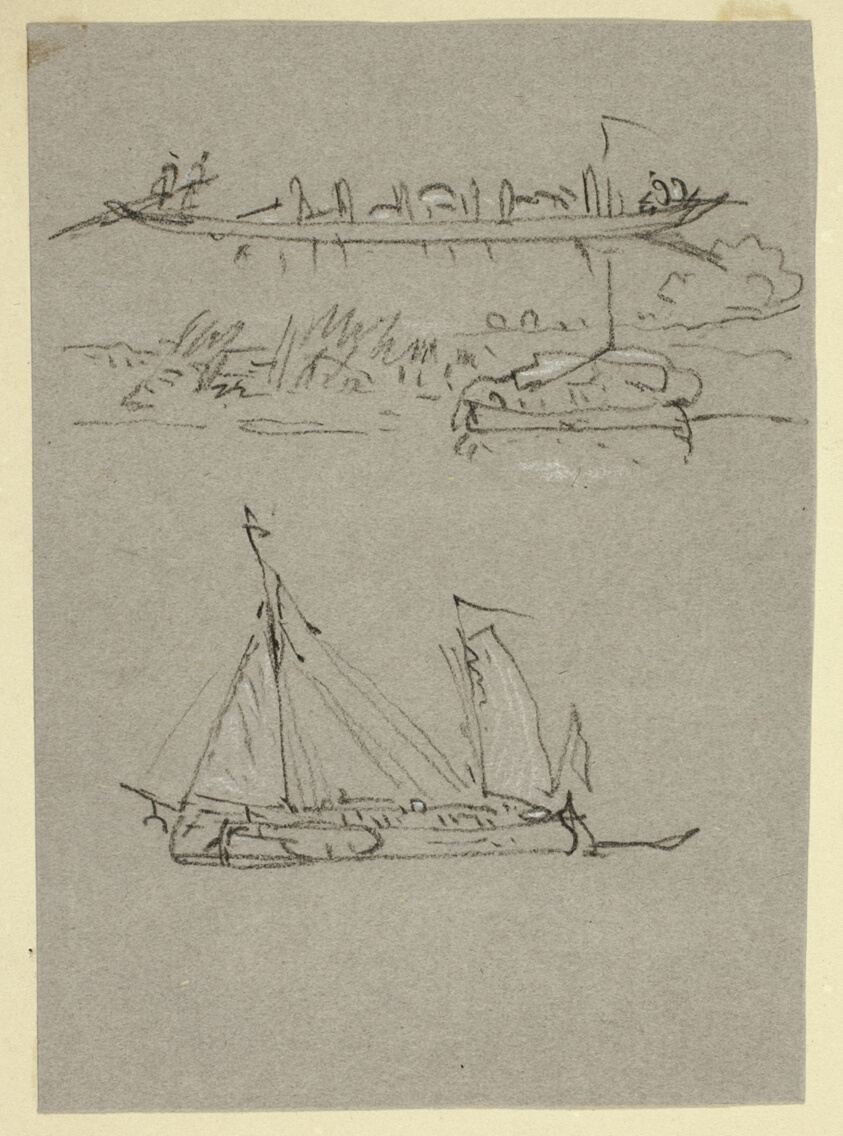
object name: Drawing and Watercolor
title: River Scenes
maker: William Alfred Delamotte (English, 1775-1863)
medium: Black chalk, highlighted with white chalk, on gray wove paper, tipped onto tan wove paper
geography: England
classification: chalk; drawings (visual works); prints and drawing